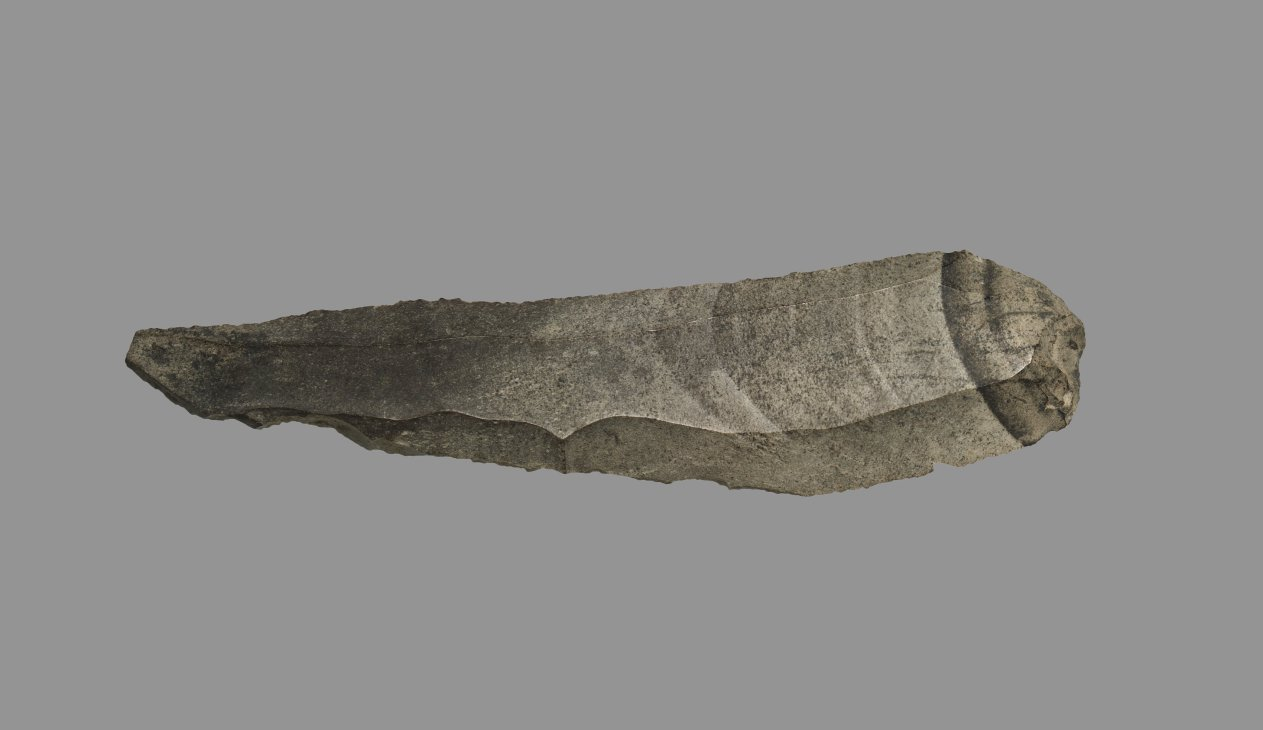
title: Sickle Blade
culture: Egypt, Middle Kingdom (2040–1648 BCE), Dynasty 12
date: 1980–1801 BCE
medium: flint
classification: Implements